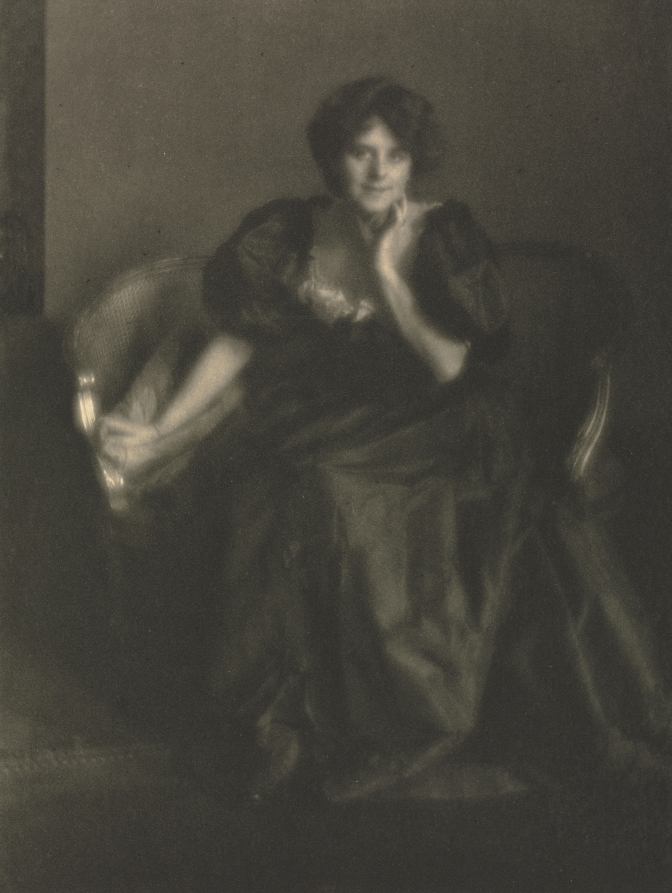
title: Camera Work: Portrait - Mrs. Harrington Mann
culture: America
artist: Clarence H. White (American, 1871–1925)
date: 1908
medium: photogravure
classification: Bound Volume